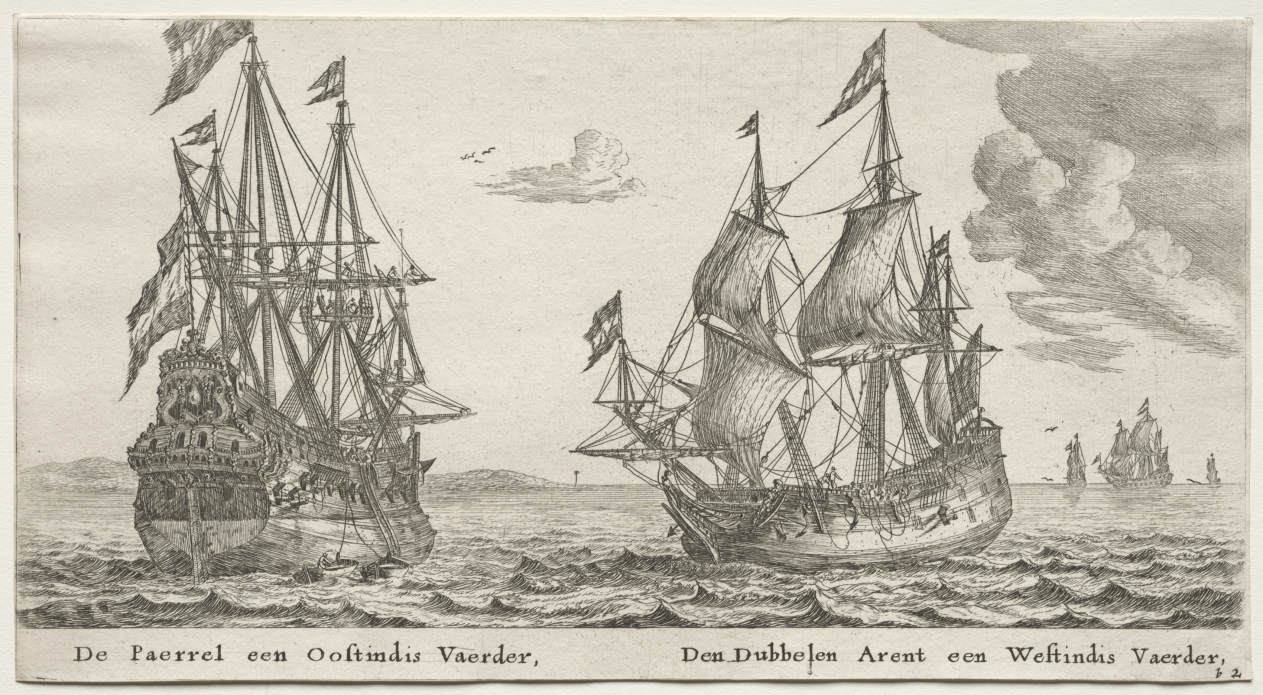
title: Various Ships and Views of Amsterdam (Verscheÿde Schepen en Gesichten van Amstelredam), Part II: The Pearl and East Indiaman, The Double Eagle, a West Indiaman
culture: Netherlands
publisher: Clement de Jonghe (Dutch, 1579–1679)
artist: Reinier Nooms, called Zeeman (Dutch, c. 1623–1664)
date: 1652–54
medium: etching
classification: Print